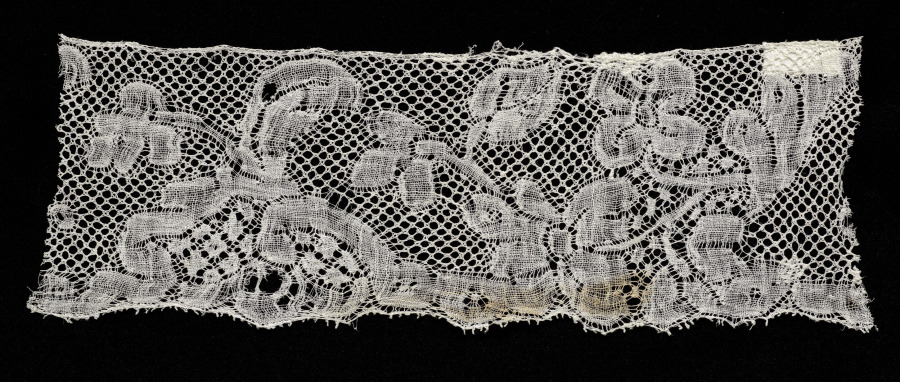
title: Lace Edging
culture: Spain, Huelva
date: 1700s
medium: Bobbin lace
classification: Lace